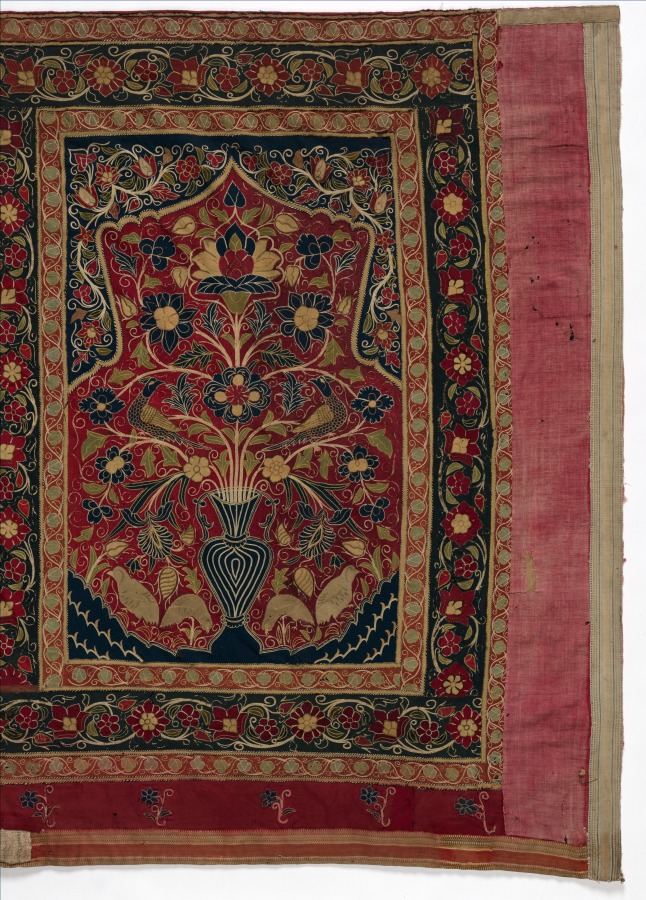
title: Royal Round Tent made for Muhammad Shah (wall panel with three design units)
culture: Iran, Rasht, Qajar period (1779-1925)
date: 1834–48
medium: Interior: wool: plain weave, inlaid work; silk: embroidery, chain stitch; tape, leather; Exterior: cotton, wool: plain weave; rope, iron ring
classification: Textile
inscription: Inscriptions: The central design unit of this wall panel has two embroidered inscriptions. 1. Upper inscription (center of the top blossom): "Muhammad shah sultan-e ghazi."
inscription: 2. Lower inscription (on the base of the vase): "Kamtarin bandeh-ye dargah fath'ali."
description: Royal tents were potent symbols of authority, wealth, and power throughout the greater Middle East. Rulers owned thousands of tents. They were used for shelter, shade, and innumerable functions in tent compounds that were essential for imperial ceremonies, travel, and military campaigns. Distinguished by size with elaborately decorated interior walls and ceilings, tents could be as large as castles. Opulent tents were also presented as imperial gifts. Tents are only known through documents before 1600. For example, in Baghdad in 809, Caliph Harun al-Rashid owned 4,000 ceremonial tents and 150,000 camping tents that were stored in the imperial Abbasid treasury. An astonishing variety and quantity of tents were housed in the royal Fatimid tent storeroom in Cairo in 1068-69, including "military tents, fortress tents, and castle tents, manufactured of . . . gold-brocaded stuff embroidered with designs of elephants, wild beasts, horses, peacocks, birds." Since 1600, Ottoman Turkish tents with elaborate floral decoration have been preserved in Istanbul in the Topkapi Palace Museum and Military Museum, and in European collections as war booty, primarily from the Ottoman Turks' attempt to conquer Vienna in 1683. These tents are not done in the Rasht technique, but rather are applique. In contrast, royal tents from Iran are extremely rare. This spectacular ceremonial tent is embroidered with the name of its owner, Muhammad Shah, who ruled Iran from 1834 to 1848 during the Qajar dynasty. The radiant jewellike interior features exuberant flora, blossoming vines, and robust birds made with colored wool embellished with silk-thread embroidery.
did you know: Rasht work is named after the city on the Caspian Sea in present-day Iran, which was a major silk trade center with numerous textile workshops.